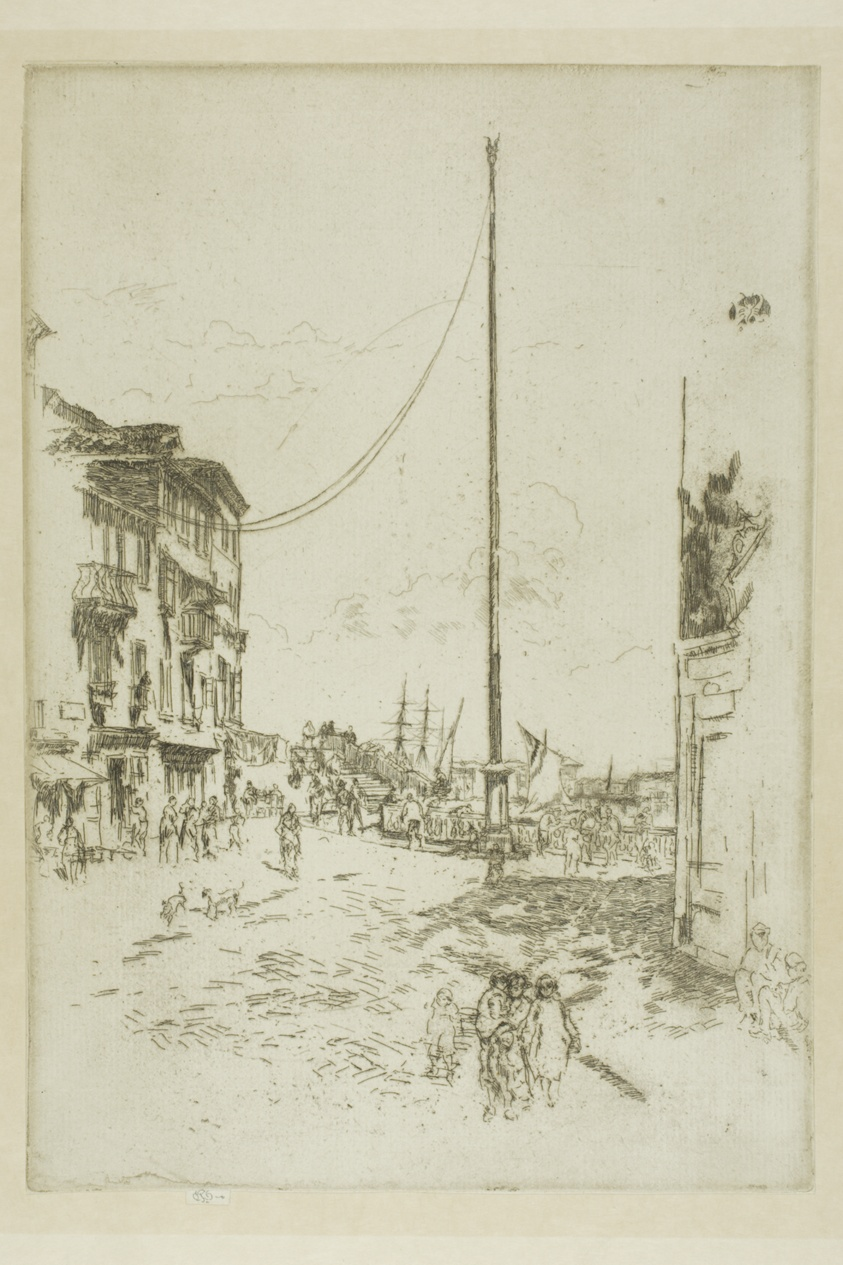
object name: Print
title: The Little Mast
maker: James McNeill Whistler (American, 1834-1903)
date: 1879/80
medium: Etching and drypoint with foul biting in dark brown ink on ivory laid paper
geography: United States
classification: etching; drypoint; print; prints and drawing; foul biting; paper